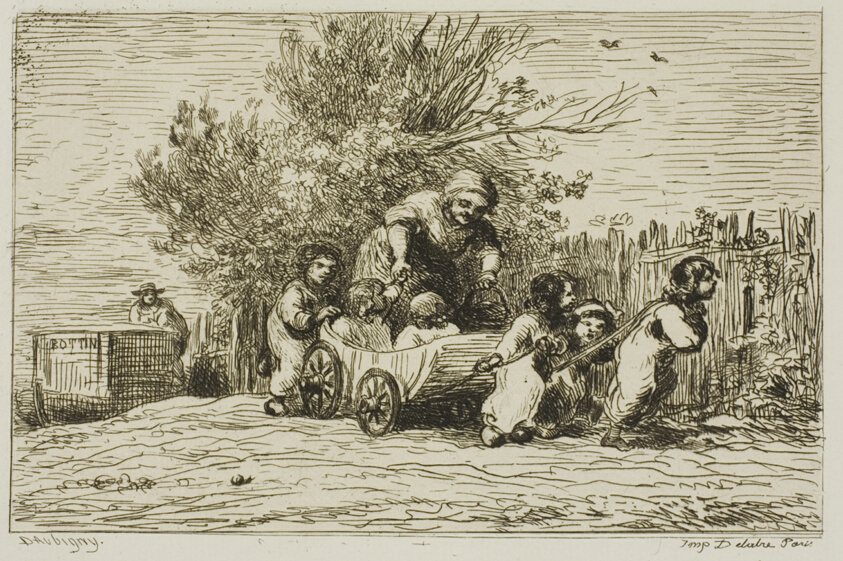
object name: Print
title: The Heritage of the Wagon (The Children with the Wagon)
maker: Charles François Daubigny (French, 1817-1878)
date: 1861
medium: Etching on ivory laid paper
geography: France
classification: etching; print; prints and drawing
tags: children